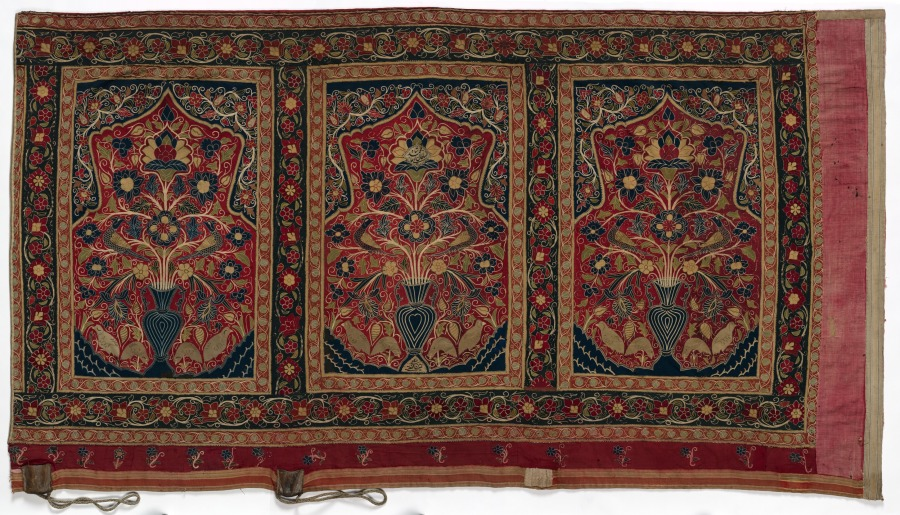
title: Royal Round Tent made for Muhammad Shah (wall panel with three design units)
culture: Iran, Rasht, Qajar period (1779-1925)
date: 1834–48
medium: Interior: wool: plain weave, inlaid work; silk: embroidery, chain stitch; tape, leather; Exterior: cotton, wool: plain weave; rope, iron ring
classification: Textile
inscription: Inscriptions: The central design unit of this wall panel has two embroidered inscriptions. 1. Upper inscription (center of the top blossom): "Muhammad shah sultan-e ghazi."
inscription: 2. Lower inscription (on the base of the vase): "Kamtarin bandeh-ye dargah fath'ali."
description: Royal tents were potent symbols of authority, wealth, and power throughout the greater Middle East. Rulers owned thousands of tents. They were used for shelter, shade, and innumerable functions in tent compounds that were essential for imperial ceremonies, travel, and military campaigns. Distinguished by size with elaborately decorated interior walls and ceilings, tents could be as large as castles. Opulent tents were also presented as imperial gifts. Tents are only known through documents before 1600. For example, in Baghdad in 809, Caliph Harun al-Rashid owned 4,000 ceremonial tents and 150,000 camping tents that were stored in the imperial Abbasid treasury. An astonishing variety and quantity of tents were housed in the royal Fatimid tent storeroom in Cairo in 1068-69, including "military tents, fortress tents, and castle tents, manufactured of . . . gold-brocaded stuff embroidered with designs of elephants, wild beasts, horses, peacocks, birds." Since 1600, Ottoman Turkish tents with elaborate floral decoration have been preserved in Istanbul in the Topkapi Palace Museum and Military Museum, and in European collections as war booty, primarily from the Ottoman Turks' attempt to conquer Vienna in 1683. These tents are not done in the Rasht technique, but rather are applique. In contrast, royal tents from Iran are extremely rare. This spectacular ceremonial tent is embroidered with the name of its owner, Muhammad Shah, who ruled Iran from 1834 to 1848 during the Qajar dynasty. The radiant jewellike interior features exuberant flora, blossoming vines, and robust birds made with colored wool embellished with silk-thread embroidery.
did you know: Rasht work is named after the city on the Caspian Sea in present-day Iran, which was a major silk trade center with numerous textile workshops.